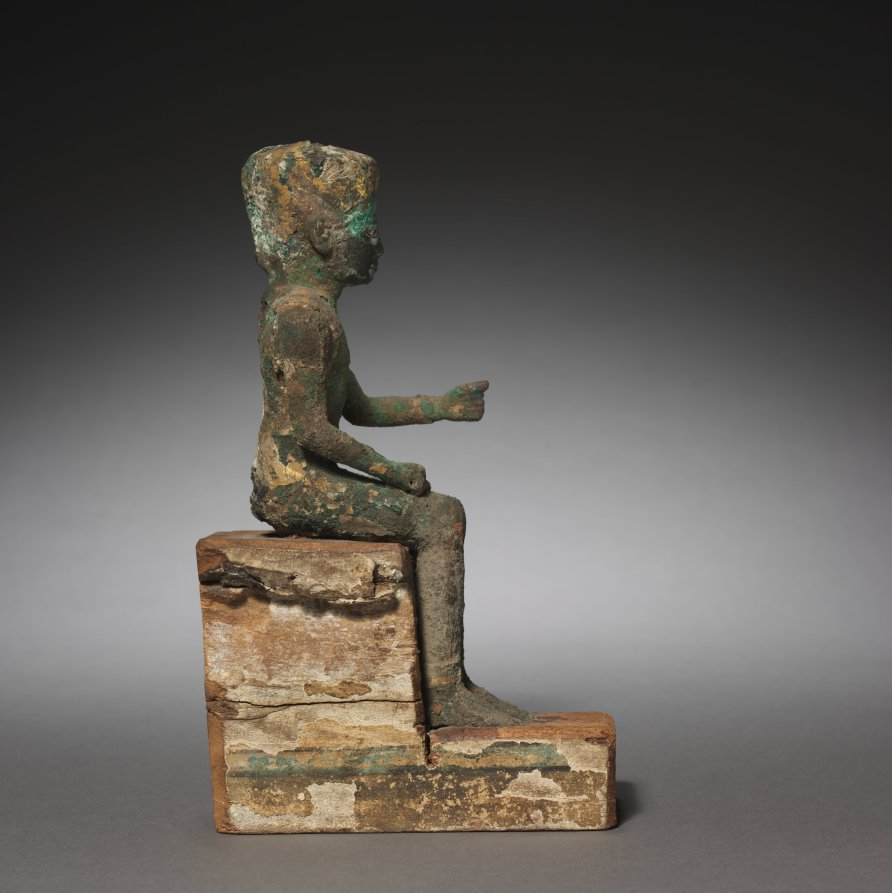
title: Statuette: Seated Amen-Ra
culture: Egypt, Late period (715–332 BCE), Dynasties 25–26(?)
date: 715–525 BCE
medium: bronze and black copper, gilded and inlaid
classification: Sculpture